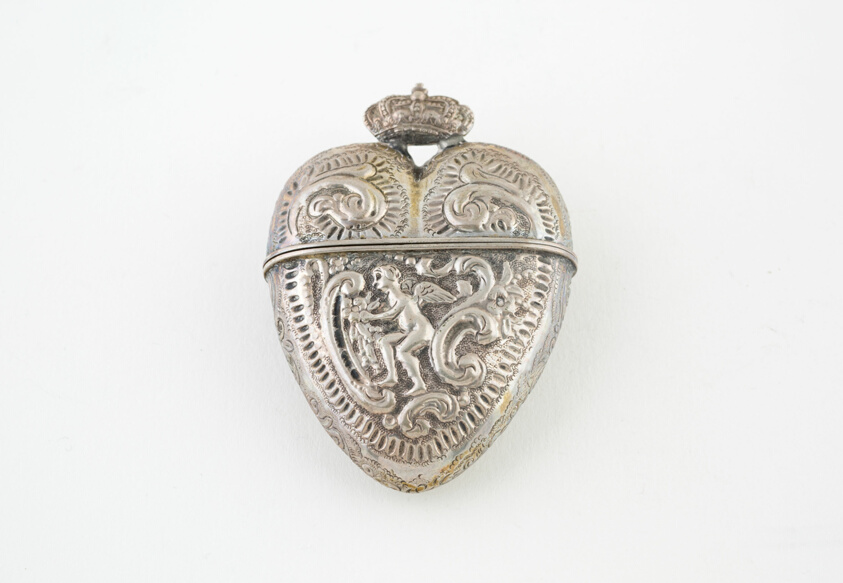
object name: Metalwork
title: Sponge Box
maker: Denmark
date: c. 1830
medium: Silver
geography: Denmark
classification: container for personal use; box; european decorative arts; metalwork; silver; decorative object/ornament